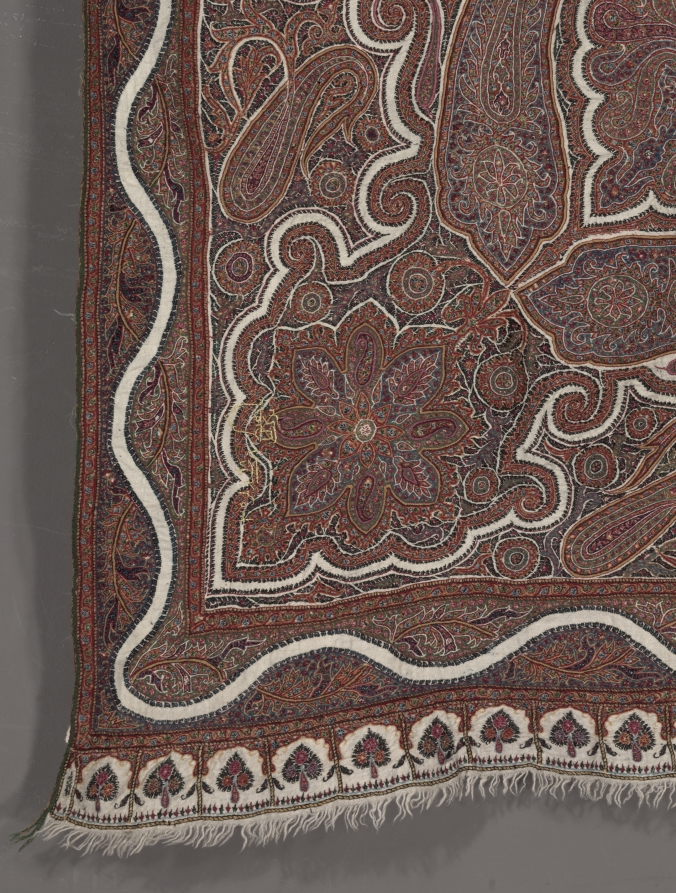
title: Square Shawl ("amli")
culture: India, Kashmir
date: mid-1800s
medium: Wool: embroidery (large-pieced areas)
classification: Embroidery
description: The central white medallion radiates into a swirling pattern of rosettes and teardrop-shaped “tree-of-life” motifs, also known as paisley, that spread over the entire surface. In the border is an undulating vine and a row of gate-like elements filled with individual trees. Kashmiri shawls were signs of high social status in India. Beginning in the late 1700s, the shawls were also coveted throughout Europe and America, until they began to fall out of fashion during the 1870s.